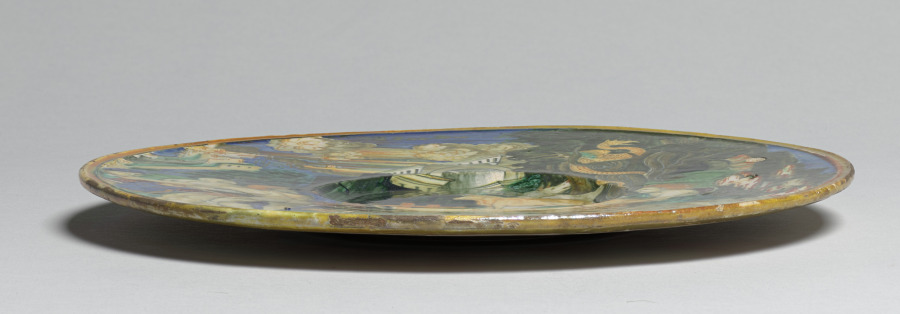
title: Plate Depicting the Myth of Cadmus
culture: Italy, Urbino region, Gubbio, 16th century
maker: circle of Maestro Giorgio Andreoli (Italian, 1465?–1553)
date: 1526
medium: tin-glazed earthenware with gold lustre (maiolica)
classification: Ceramic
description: Obeying the command of an oracle, Cadmus followed a cow to Boeotia, or “oxen-land.” There he slayed a dragon and buried its teeth in the ground. From the teeth grew a crop of warriors who fought each other until only the strongest five remained. Cadmus invited the victors to join him, and together they built the city of Thebes, where the mythological hero, Hercules (or Herakles) was later born.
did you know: This plate depicts multiple scenes from the Greek myth of Cadmus.